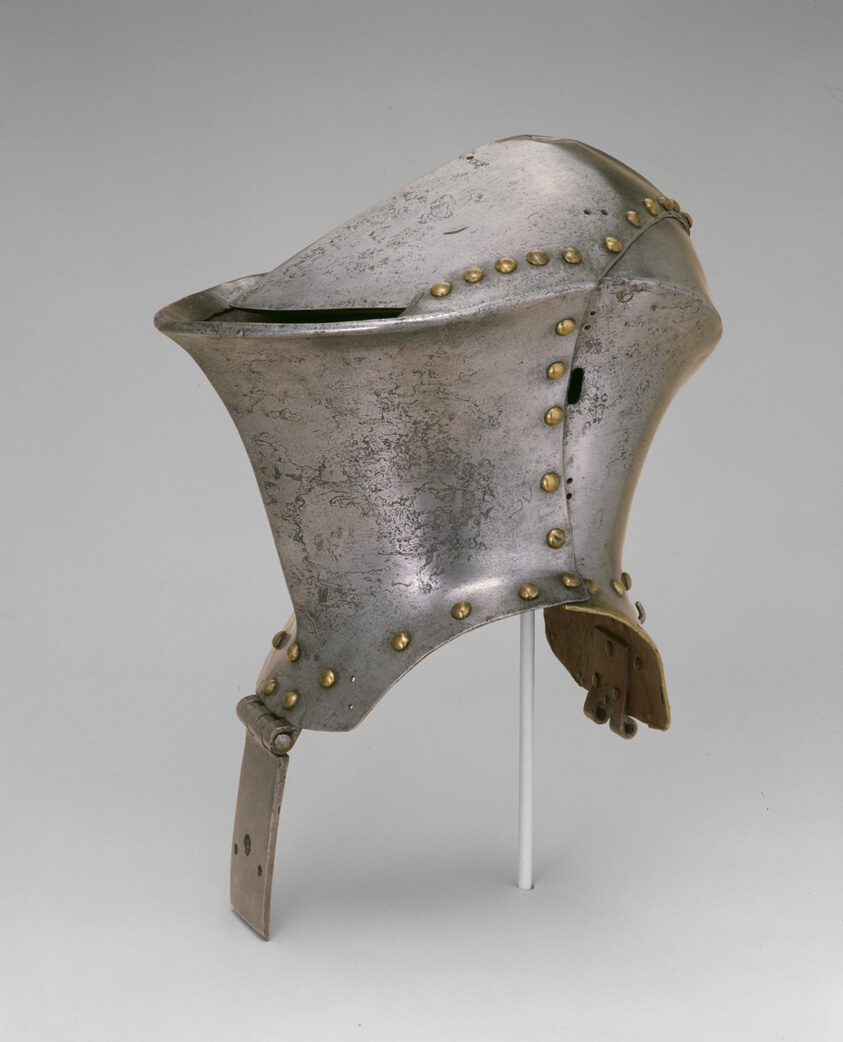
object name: Armor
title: Tournament Helm (Stechhelm)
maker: Austrian, Innsbruck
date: c. 1490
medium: Steel, brass, and iron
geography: Innsbruck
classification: suit-helmet; armor; arms and armor